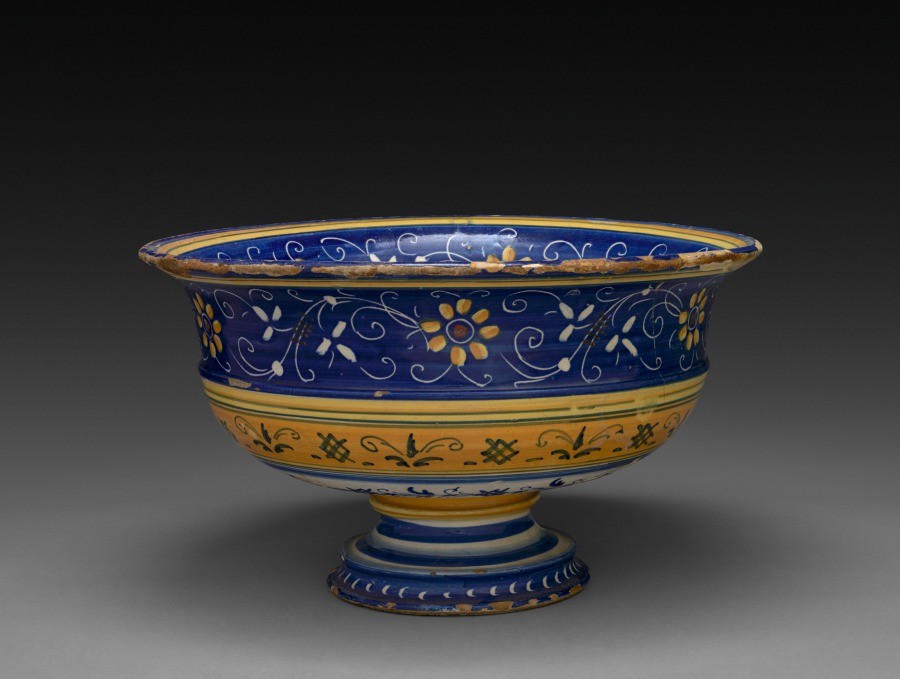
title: Bowl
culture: Italy, 16th century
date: c. 1520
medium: tin-glazed earthenware (maiolica)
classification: Ceramic